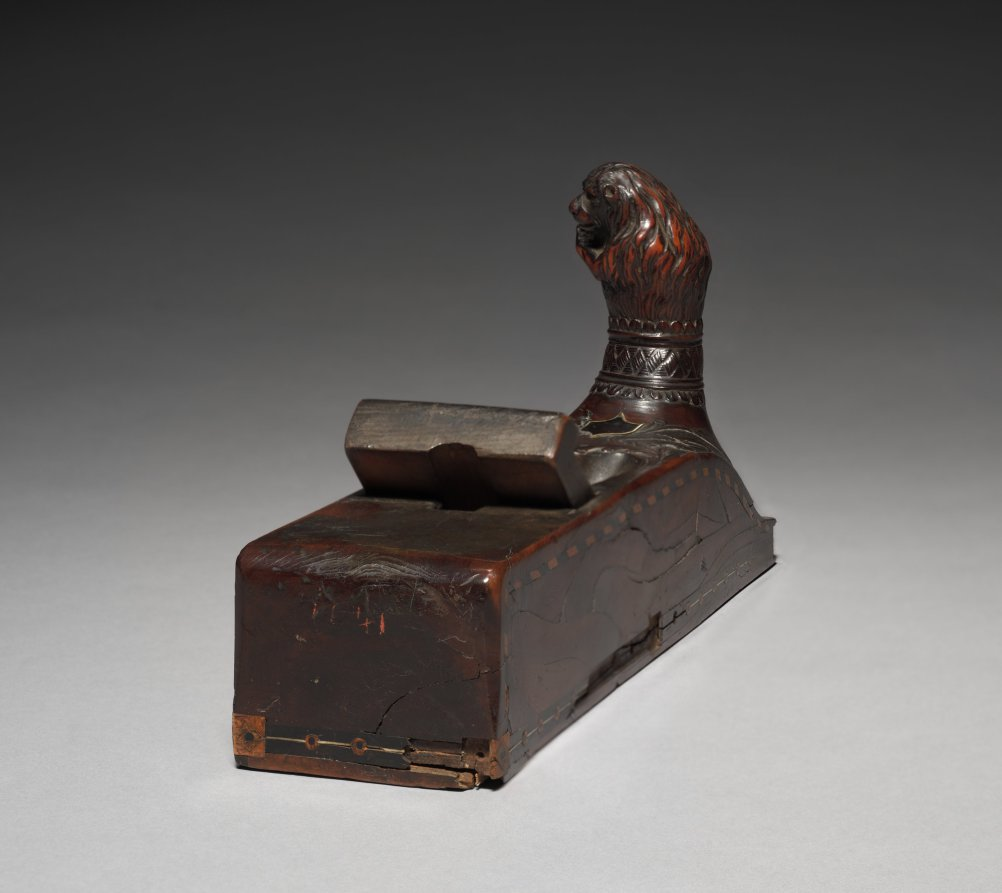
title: Carpenter's Plane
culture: Italy, late 17th century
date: late 1600s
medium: wood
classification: Tool